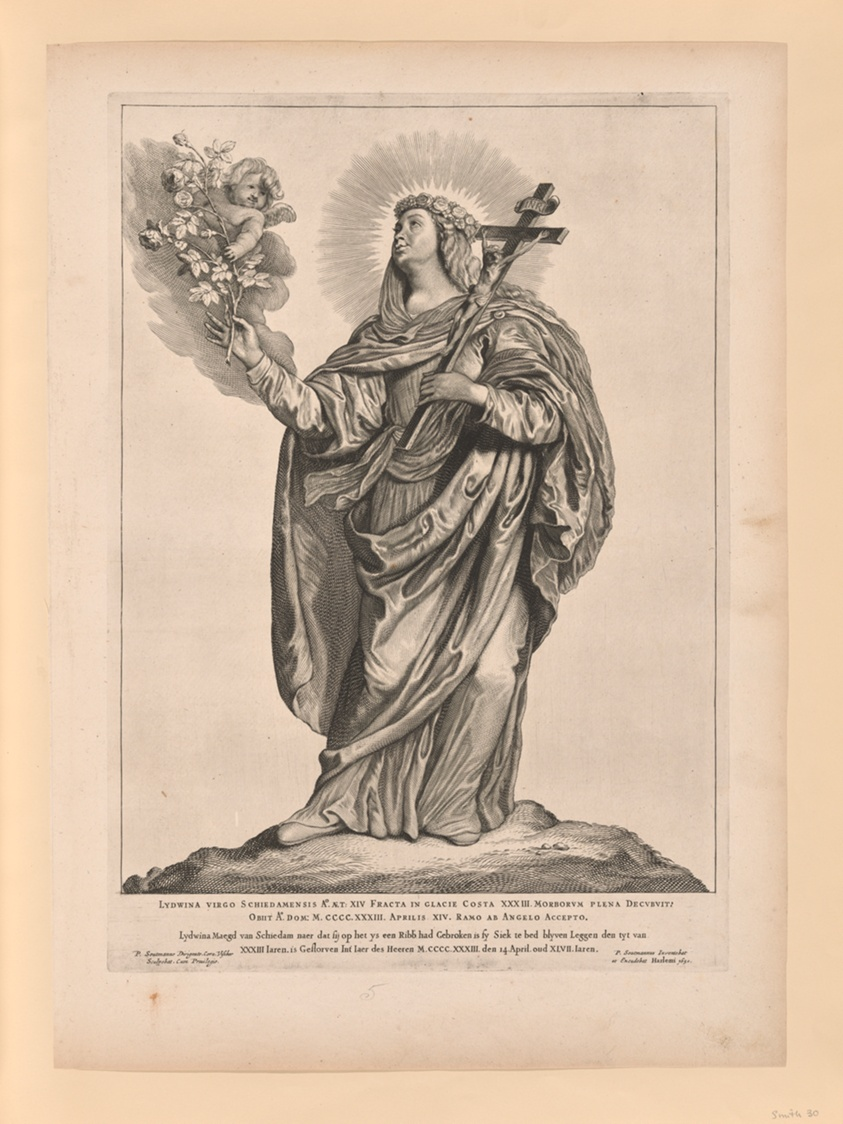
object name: Print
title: Saint Liduina, from Saints of the North and South Netherlands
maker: Cornelis Visscher (Dutch, c. 1629-1658); after Pieter Claesz. Soutman (Dutch, c. 1580–1657)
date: 1650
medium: Engraving on paper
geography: Netherlands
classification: engraving; paper; print; prints and drawing